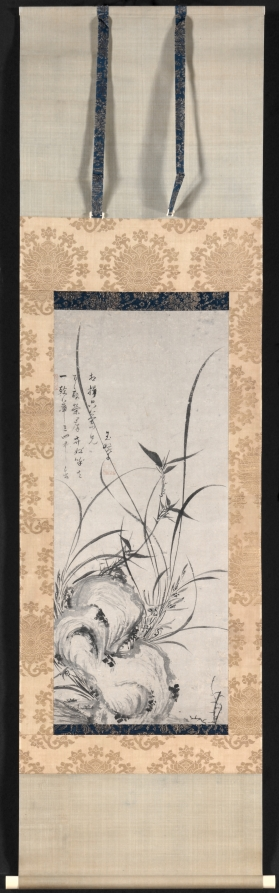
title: Rock, Bamboo, and Orchids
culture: Japan, Muromachi period (1392–1573)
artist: Gyokuen Bonpō (Japanese, 1348–after 1420)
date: late 1300s–early 1400s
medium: hanging scroll; ink on paper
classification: Painting